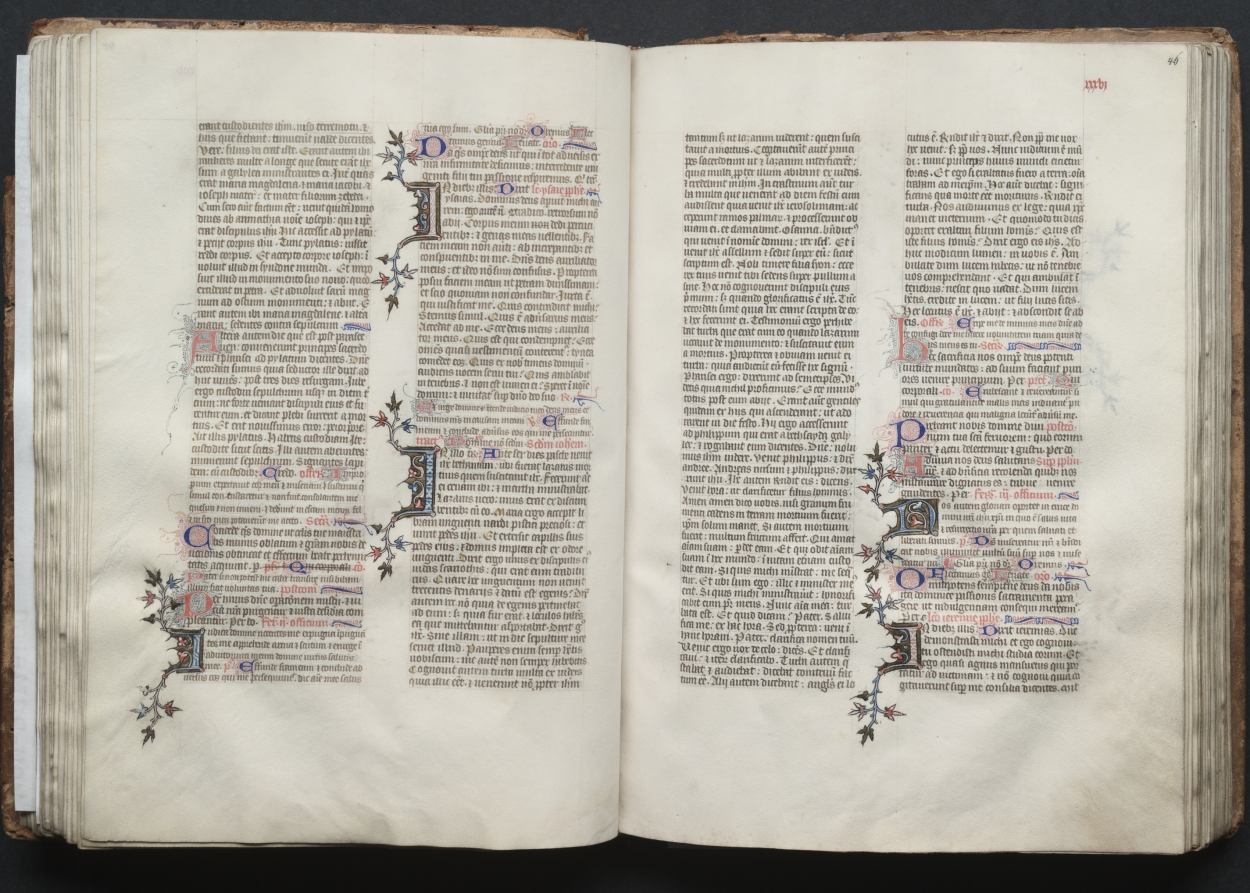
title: The Gotha Missal: Fol. 46r, Text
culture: France, Paris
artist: Master of the Boqueteaux (French)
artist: and Workshop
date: c. 1375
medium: ink, tempera, and gold on vellum; blind-tooled leather binding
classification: Bound Volume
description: The style and quality of this manuscript's decoration is typical of deluxe Parisian books made for aristocratic or royal patrons. Most of the book's decoration appears to be the work of the Master of the Boqueteaux, an artist active at the court of King Charles V (died 1380). His style was apparently shared by a number of book illuminators working in and around Paris. It is very possible that the Gotha Missal belonged to Charles V, but is not provable because the manuscript has no royal portraits and lacks a colophon. Given the book's magnificent decoration, however, it would seem that it was produced for a Valois prince, if not for the king himself. The manuscript receives its name from the German dukes of Gotha, its later owners.